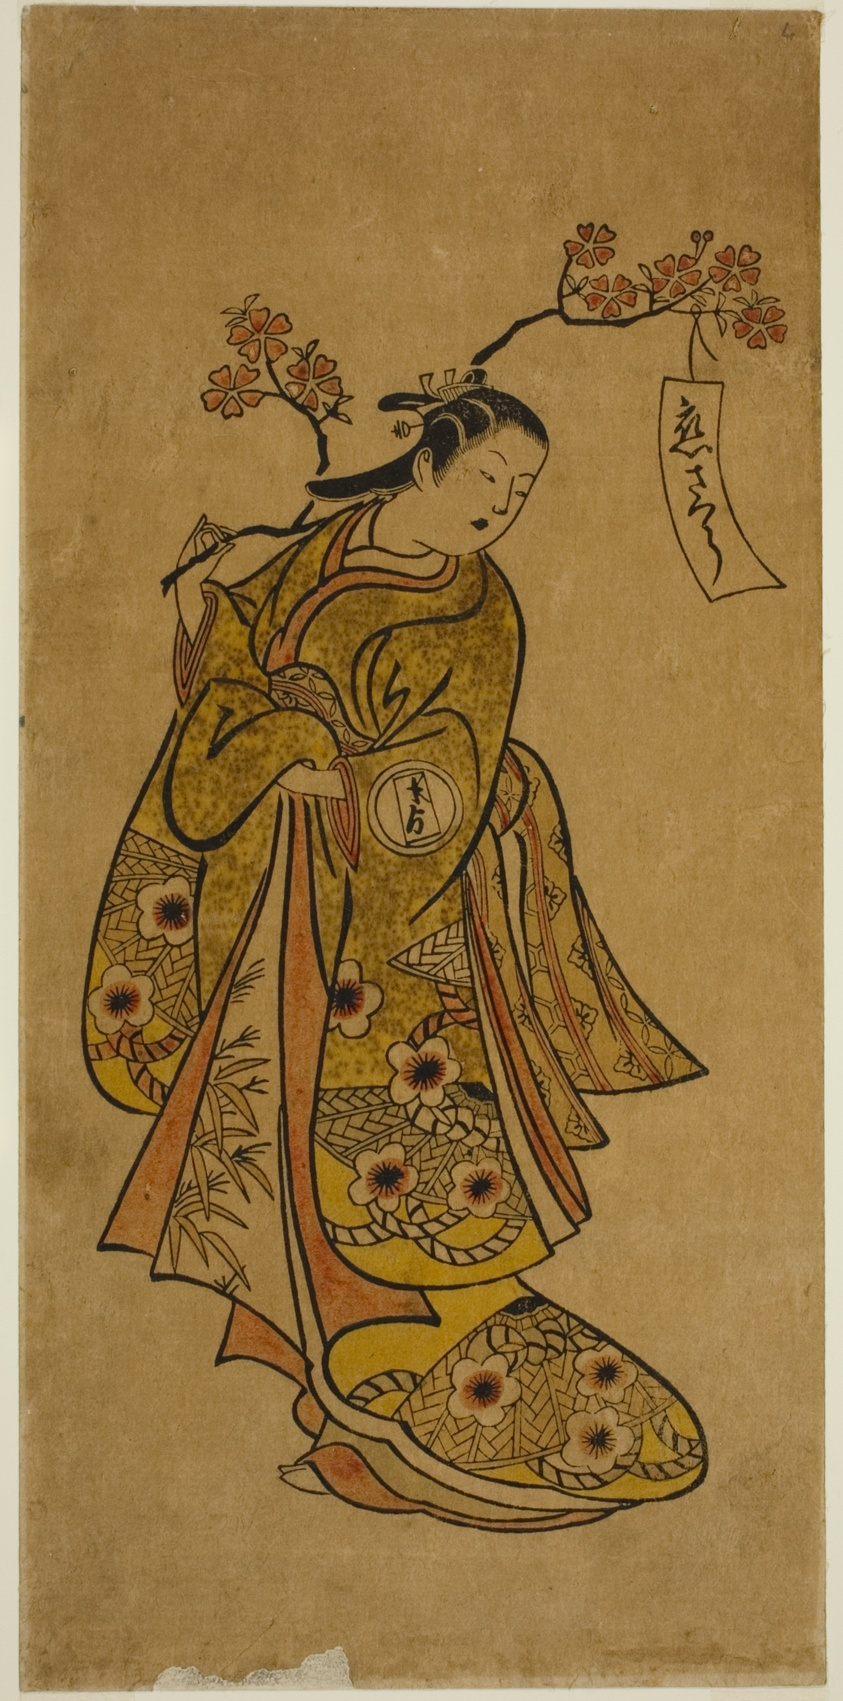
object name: Print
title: Oshichi Carrying a Blossoming Cherry Branch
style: Japanese (culture or style)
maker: Attributed to Okumura Toshinobu; Japanese, active c. 1717-50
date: c. 1727/30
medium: Hand-colored woodblock print; hosoban, urushi-e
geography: Japan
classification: woodblock print; print; asian art